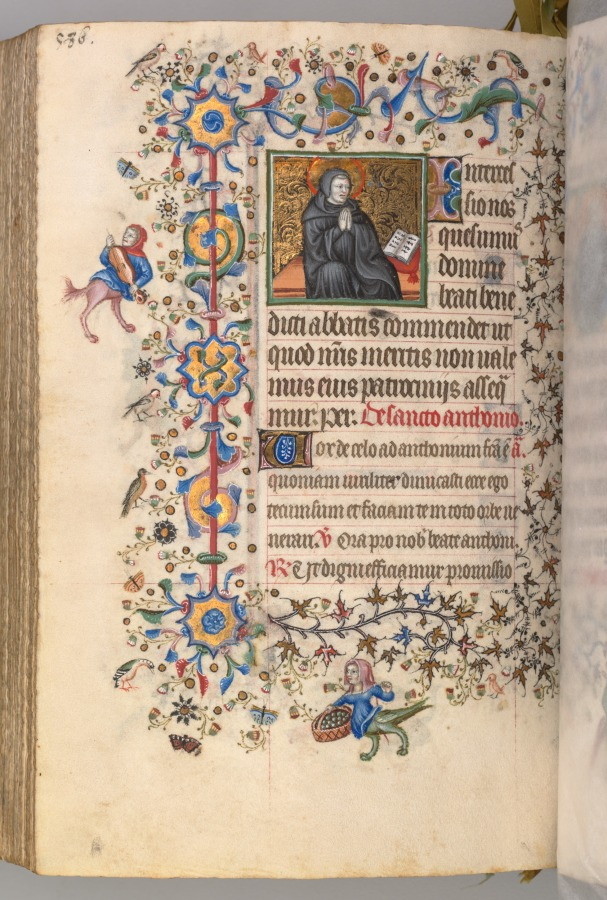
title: Hours of Charles the Noble, King of Navarre (1361-1425): fol. 287vr, St. Benoit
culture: France, Paris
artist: Master of the Brussels Initials and Associates (French)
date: c. 1405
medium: ink, tempera, and gold on vellum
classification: Bound Volume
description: This precious volume was obviously highly prized by its owner, the French-born King of Navarre, who had his coat of arms painted on no less than twenty folios. Rather than directly commissioning this manuscript from a specific workshop, it seems that Charles the Noble acquired his book of hours -- perhaps ready-made for the luxury market -- while on a trip to Paris in 1404-05. A collaborative effort, six painting styles are evidenced within the pages of this codex, those of two Italians, two Frenchmen, and two Netherlanders. The painter who was responsible for the planning and decoration of the book, and who produced seventeen of the large miniatures, was a Bolognese artist known as the Master of the Brussels Initials. His principal assistant, responsible for most of the borders, was a Florentine who signed his name "Zecho" da Firenze on folio 208 verso.